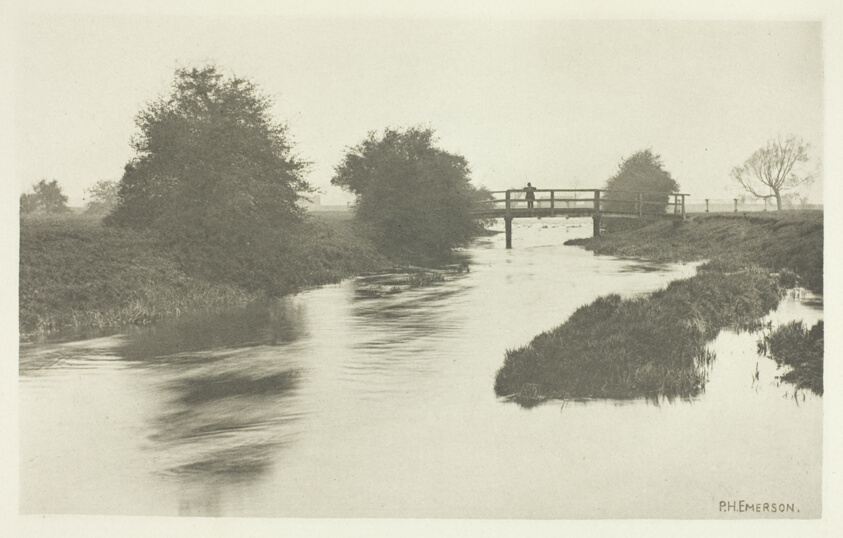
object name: Photograph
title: Footbridge Near Tottenham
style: 19th century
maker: Peter Henry Emerson (English, born Cuba, 1856–1936)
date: 1880s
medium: Photogravure, plate XXVI from the album "The Compleat Angler or the Contemplative Man's Recreation, Volume II" (1888)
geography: England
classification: photogravure; photomechanical process; photography; photograph